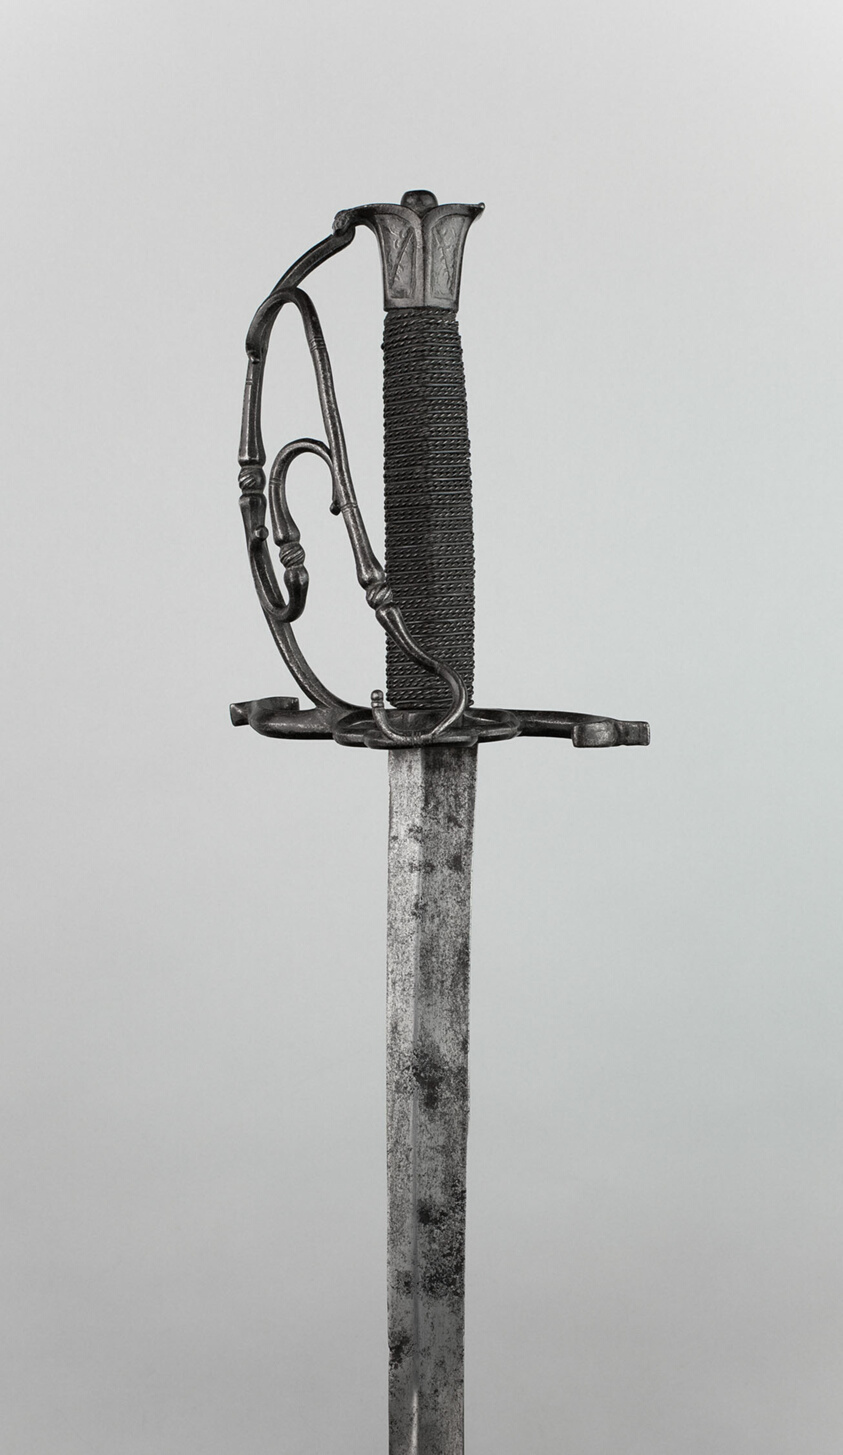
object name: Arms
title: Sabre (Kriegsmesser)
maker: German or Swiss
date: c. 1530/50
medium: Iron and steel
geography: Germany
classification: edged weapon-sword; arms; arms and armor